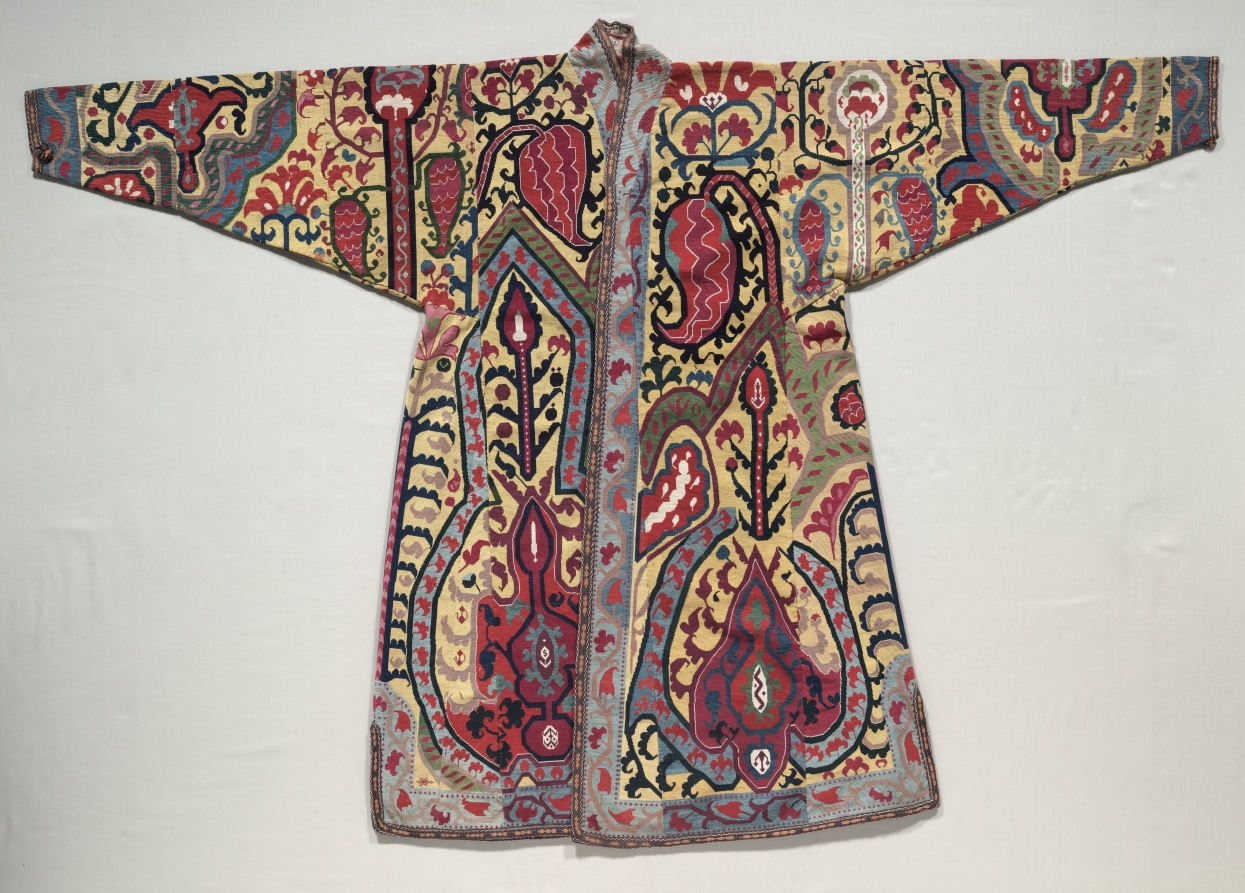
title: Man's surcoat (khalat)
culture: Uzbekistan, Shahr-i Sabz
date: late 1800s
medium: Silk: embroidery, cross-stitch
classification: Garment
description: Prestigious men’s surcoats embellished with designs such as this dramatic decoration in cross-stitch were among the most elaborate silk-thread embroidered garments in Central Asia. In a flamboyant style, large palmettes framed by split palmette leaves dominate with quartered rosettes and smaller flora on a brilliant yellow ground. Foliate vines enhance the edge along the front center opening, hemline, and cuffs. It is lined with an ikat of cypress trees and finger-looped trim. The style and technique represent professional work from Shahr-i Sabz, south of Samarkand. The pattern was drawn on the cotton ground cloth of the surcoat, then disassembled for stitching, and finally reassembled—revealed by severed and misaligned motifs plus mismatched colors.